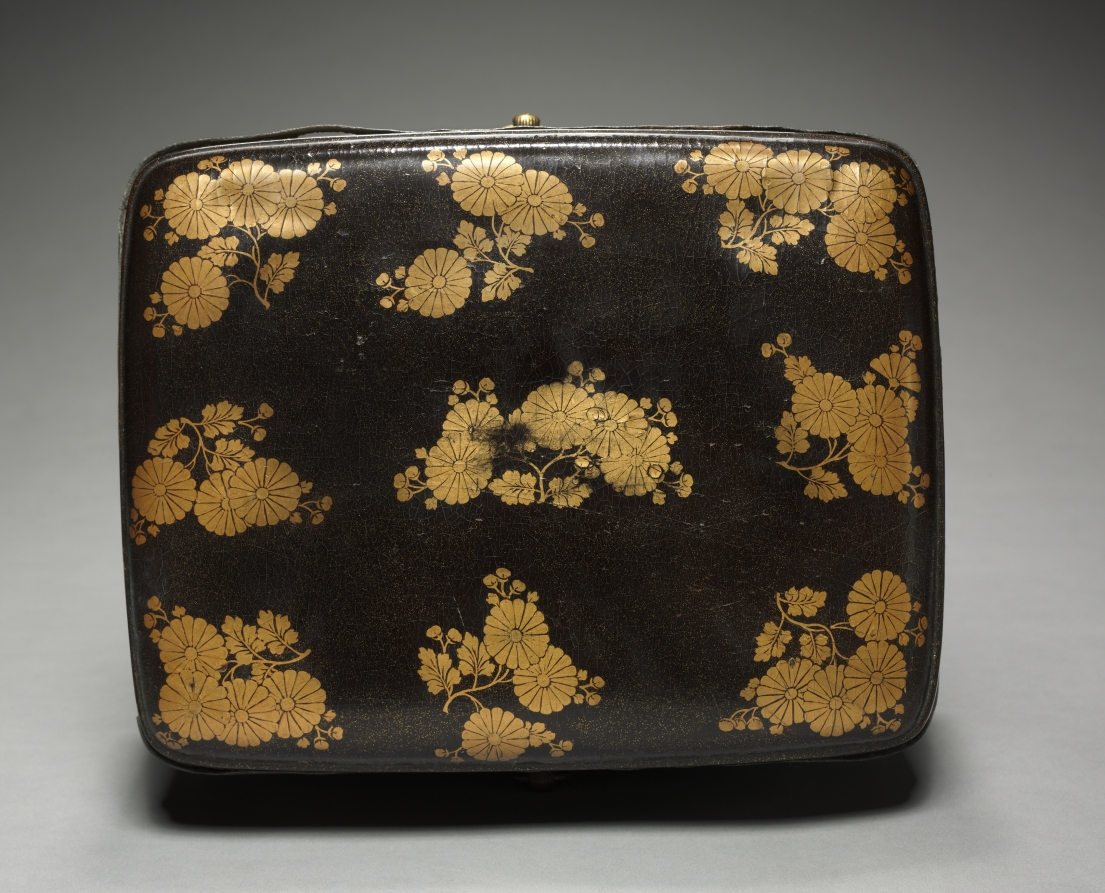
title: Cosmetics Box with Chrysanthemums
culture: Japan, Kamakura period (1185–1333)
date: early 1300s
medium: lacquer on wood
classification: Lacquer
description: In China, the chrysanthemum was historically appreciated for its association with the Double Nine Festival and the reclusive life of the poet Tao Yuanming (AD 365-427). In Japan, the 16-petaled chrysanthemum came to symbolize the Japanese imperial family after Emperor Gotoba (1180-1239) chose the motif as his personal emblem, having it applied to his sword and everyday utensils. This box proves that the flower also appeared on lacquer wares as early as the Kamakura period.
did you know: In Japanese, this type of small box is called a tebako, literally a hand box, and was typically part of a cosmetics set.